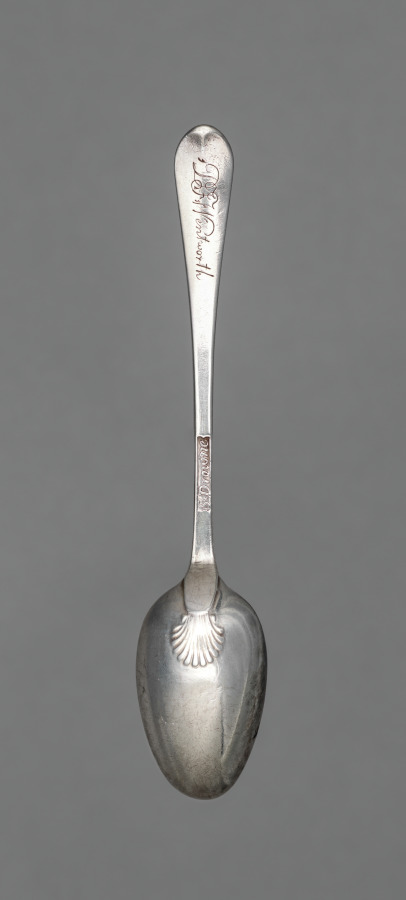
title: Teaspoon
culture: America, New Hampshire, Portsmouth, 18th century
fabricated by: Samuel II Drowne (American, 1749–1815)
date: c. 1770–1780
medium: silver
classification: Silver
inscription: engraved "M+F" in block letters on top of handle end, and "D.F.Wentworth" (later) in script on back of handle end.